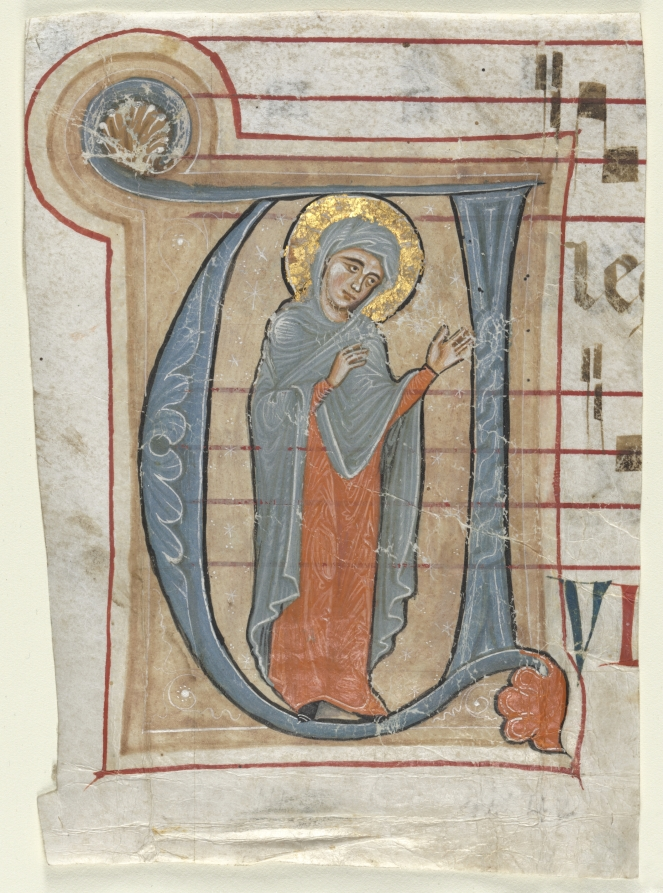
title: Fragment from a Gradual with Historiated Initial (V): The Virgin Mary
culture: Italy, Campania(?), 13th century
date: c. 1250–1275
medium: ink, tempera, and gold on parchment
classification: Manuscript